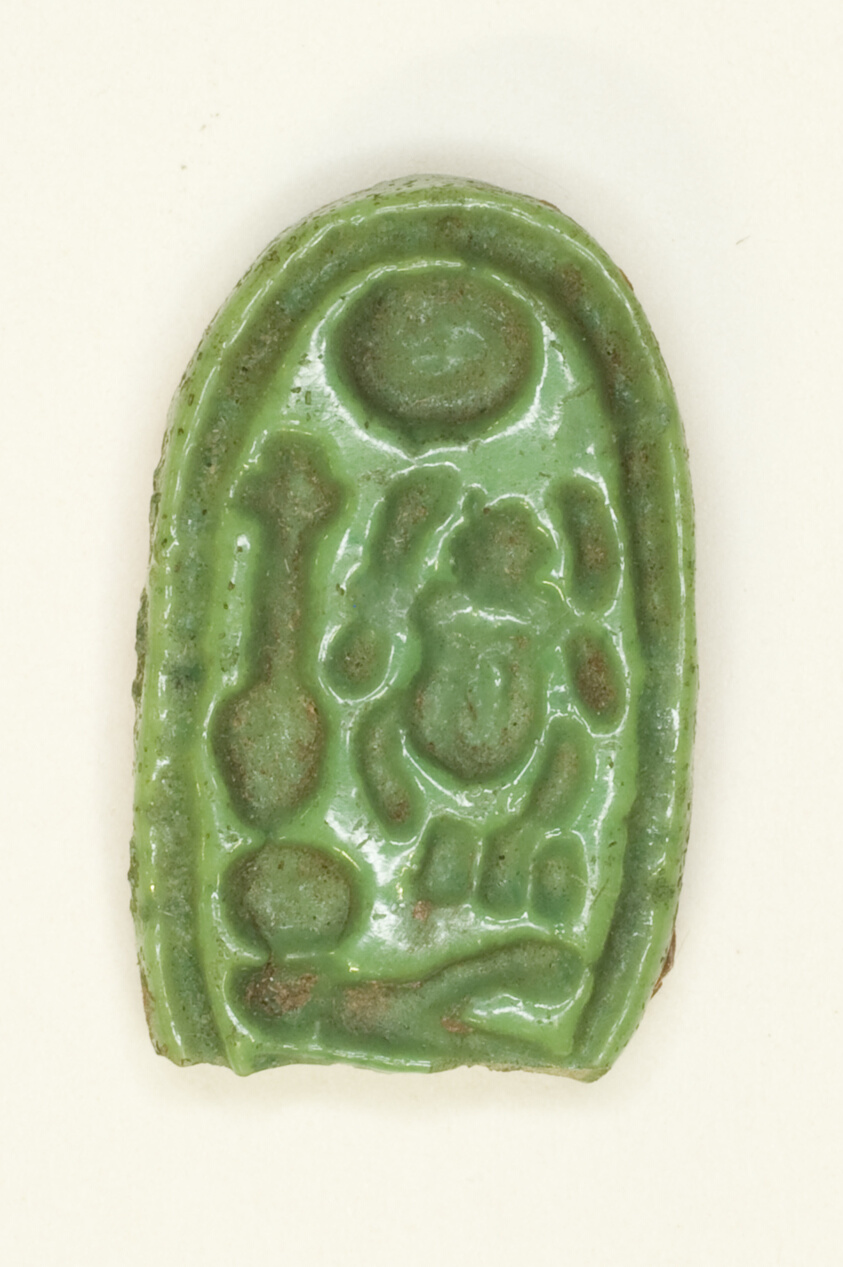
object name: Costume and Accessories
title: Ring: Neferkheprure-Waenre (Akhenaton)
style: eighteenth dynasty, new kingdom, egyptian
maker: Egyptian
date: New Kingdom, Dynasty 18, reign of Akhenaten (about 1352–1336 BCE)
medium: Faience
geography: Egypt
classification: ceramics; jewelry; ancient art; costume; faïence (composite material)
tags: pharaohs